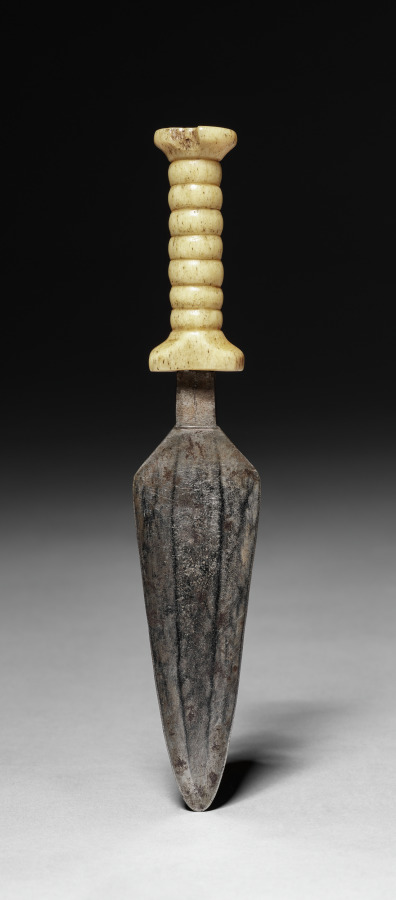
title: Dagger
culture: Africa, Central Africa, Democratic Republic of the Congo, Mangbetu-style maker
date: 1900s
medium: Iron and elephant ivory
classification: Arms and Armor